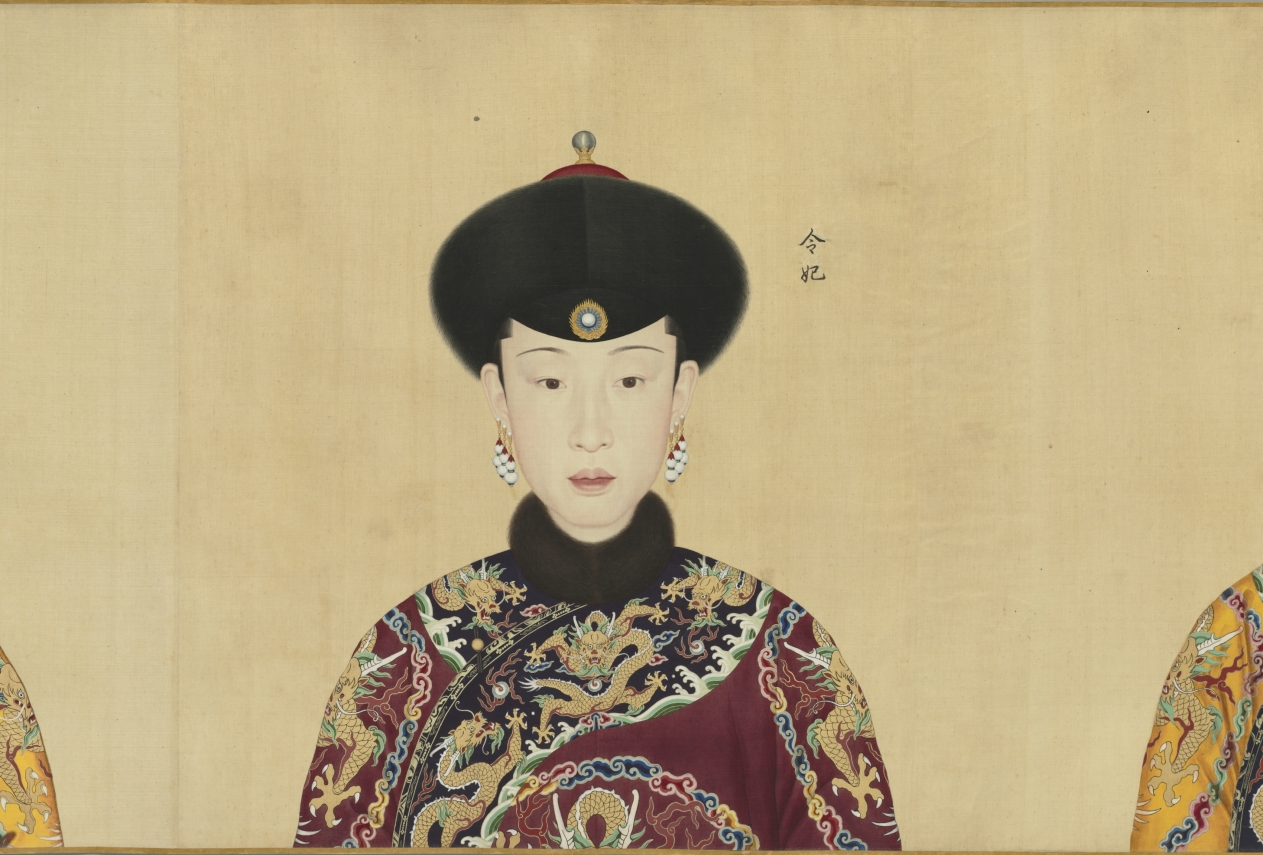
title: Portraits of the Qianlong Emperor and His Twelve Consorts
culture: China, Qing dynasty (1644–1911), Qianlong reign (1736–95)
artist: Giuseppe Castiglione (Italian, 1688–1766)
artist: and others (Chinese)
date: 1736–70s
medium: Handscroll; ink and color on silk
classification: Painting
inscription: 9 seals of the Qianlong emperor (r. 1736–95).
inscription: The eighth month, first year of Qianlong [1736] 乾隆元年八月吉日. The Empress (Xiaoxian) 皇后 (1712–1748), The Guifei (Huixian) 貴妃 (?-–1745), Chunfei 純妃 (1713–1760), Jiafei 嘉妃 (?–1755), Lingfei 令妃 (1727–1775), Shufei 舒妃 (1728–1777), Qingbin 慶嬪 (1724–1774), Yingbin 穎嬪 (1731–1800), Xinbin 忻嬪 (?–1764), Dunfei 惇妃 (1746–1806), Xunfei 順妃 (1749–1788), Shunbin 循嬪 (?–1797).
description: This portrait shows the Qianlong emperor at 26, in the first year of his reign. His likeness is followed by portraits of the empress and eleven consorts. Their portraits document the appearances of the court women around the time when they received their respective imperial titles, which occurred at different stages of the emperor's life. The first three portraits were done by the Jesuit (Roman Catholic) missionary artist Giuseppe Castiglione, whereas the later ones were by Chinese court painters. Formal portraiture contributed to the affirmation of status and construction of role and identity. This scroll served as both familial documentation and a "mind picture" of the Qianlong emperor, suggesting that his constructed image of emperorship was inseparable from concepts of self and family. It was stored in a carved red lacquer box bearing the original painting title Mind Picture of a Well-Governed and Tranquil Reign (see CMA 1969.32).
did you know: Lingfei 令妃 (1727–1775), the first consort depicted in the maroon or “incense-colored" 香色 robe, was the mother of six of Qianlong’s children, including the future Emperor Jiaqing.